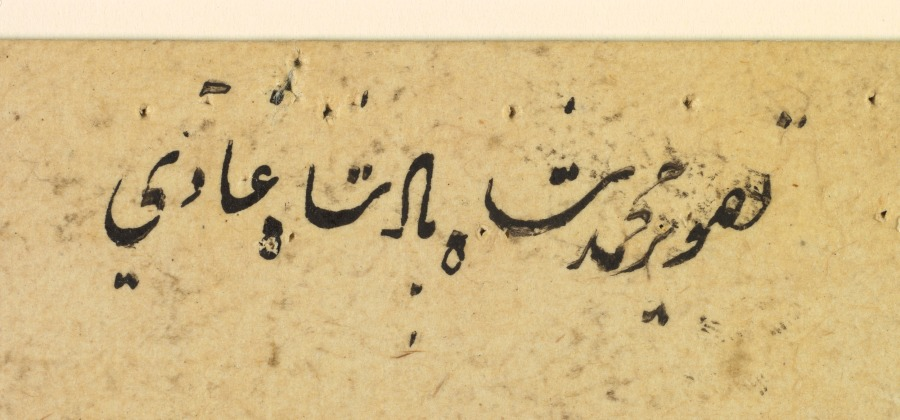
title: Posthumous portrait of the Mughal emperor Muhammad Shah (reigned 1719–1748) holding a falcon (recto)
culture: Mughal India, probably Uttar Pradesh, Lucknow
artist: Muhammad Rizavi Hindi (Indian, active mid-1700s)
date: 1764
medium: Gum tempera, ink, and gold on paper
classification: Painting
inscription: raqam-i kamtarin Muhammad Reza-i Hindi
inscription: tasvir Muhammad Shah Padshah Ghazi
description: The artist used the carpet, the floor cushion, and the halo to indicate the royal status of the seated figure. He has turned the picture plane into the space of a window, over the sill of which a golden carpet ornamented with a field of lilies marks his location for outsiders. His signature in Persian, the Mughal lingua franca, interrupts the fringed border. Painted after the emperor’s death and the dissolution of much of the Mughal court, this refined portrait pays tribute to the wealth and power of the imperial past.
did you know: The archer’s thumb ring is for drawing the bowstring. Perhaps he was left-handed.